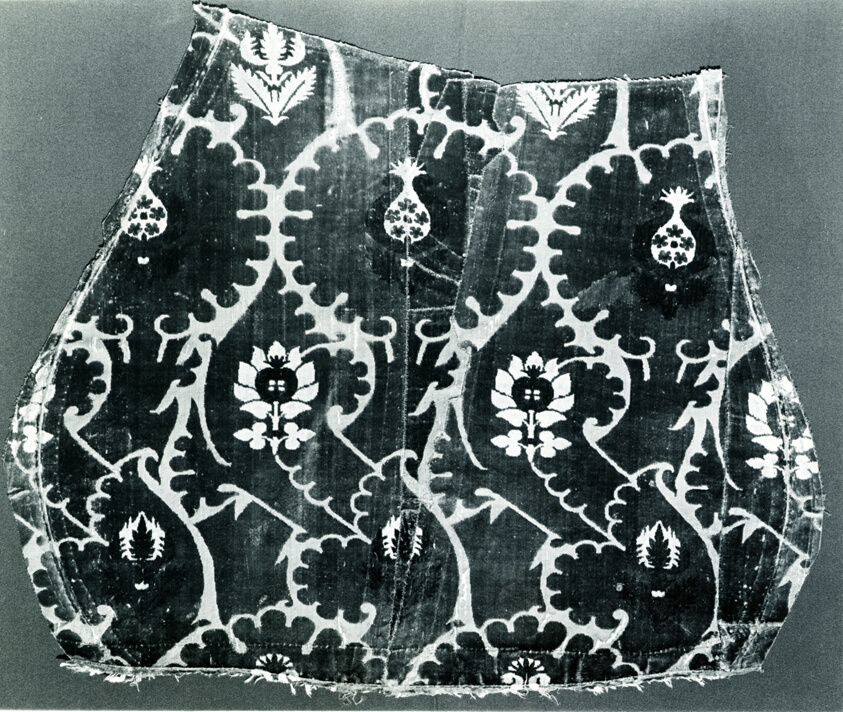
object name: Textile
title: Fragment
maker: Italy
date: 15th century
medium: Silk, warp-float faced 4:1 satin weave with three color supplementary pile warps forming cut voided velvet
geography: Italy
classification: textile; weaving - velvet